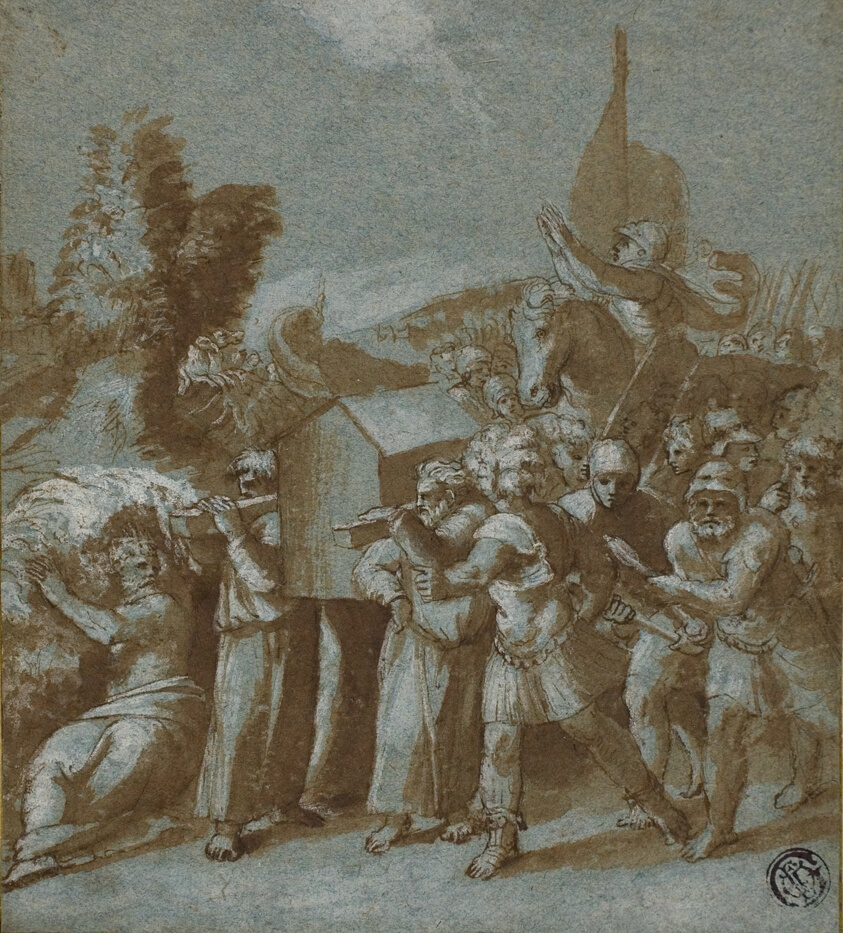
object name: Drawing and Watercolor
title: Joshua and the Israelites Crossing the Jordan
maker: After Raffaello Sanzio, called Raphael; Italian, 1483-1520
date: 16th century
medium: Pen and brown ink, with brush and brown wash, heightened with lead white, on blue laid paper, laid down on ivory laid paper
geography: Italy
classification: ink or chalk wash; drawings (visual works); prints and drawing